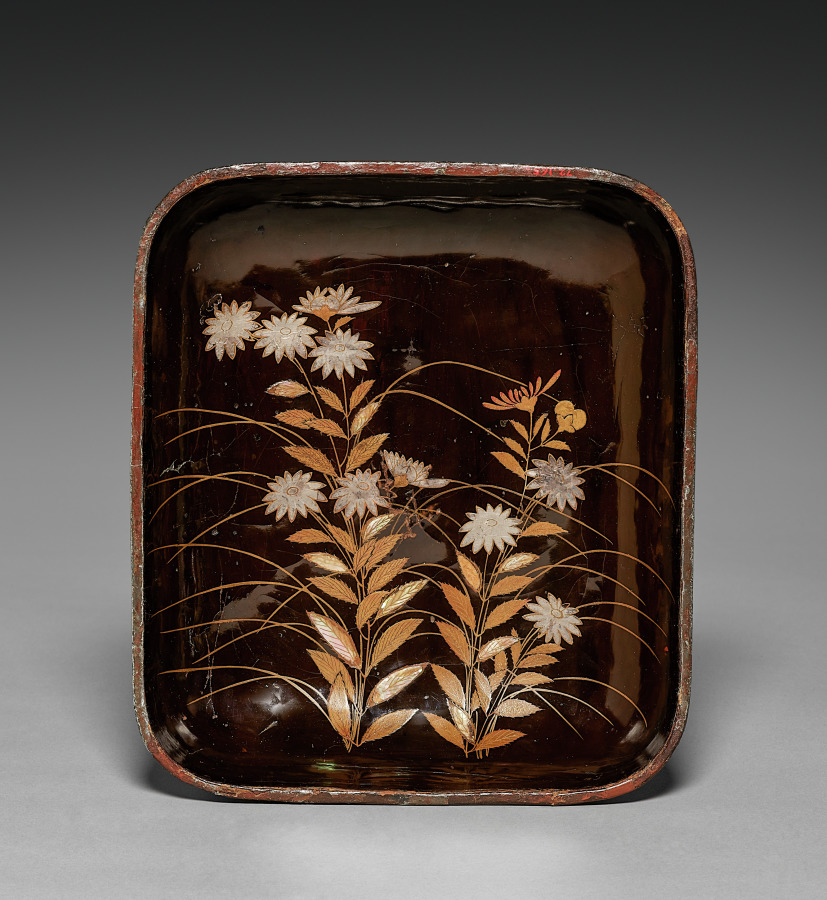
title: Letter Box (lid)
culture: Japan, Edo period (1615–1868)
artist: manner of Ogata Kōrin (Japanese, 1658–1716)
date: 1700s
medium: lacquer with pewter and mother-of-pearl inlay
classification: Lacquer